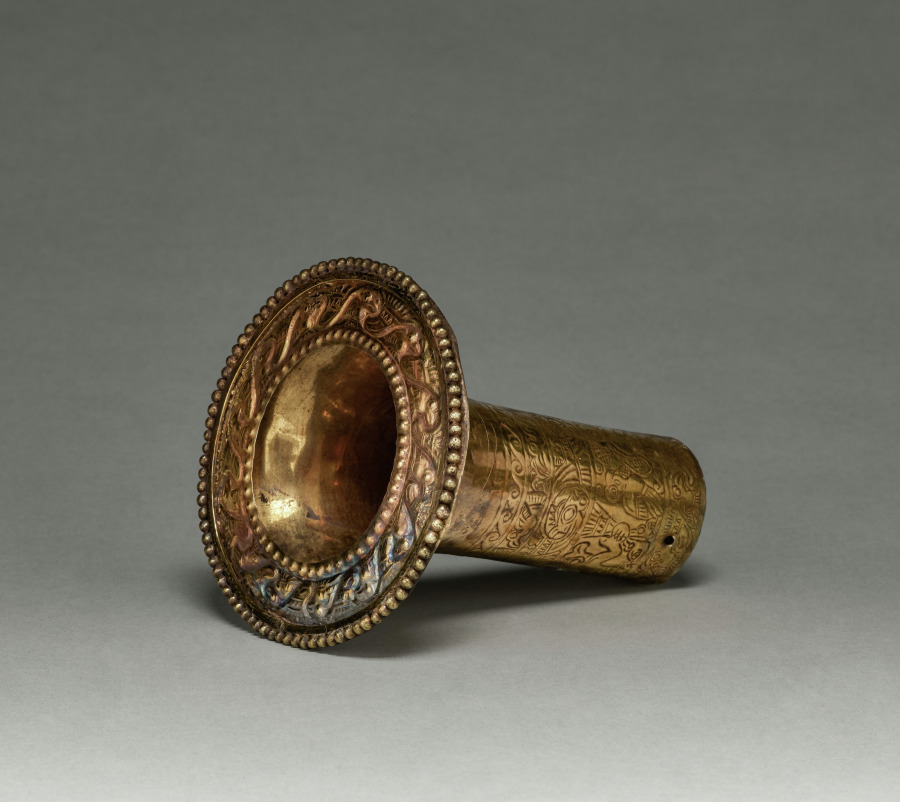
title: Ear Flare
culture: Peru, North Coast, Chimú style (900-1470)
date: 900–1470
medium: hammered gold alloy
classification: Metalwork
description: North Coast ear ornaments typically have a long shaft that balanced the weight of the glorious frontal. This pair illustrates Chimú interest in the sea, which had great economic and religious importance. On the shafts are bands of seabirds and waves, and a similar pattern edges the frontals, which were altered in modern times. Originally solid disks, the frontals' centers were cut out and a dotted band was added to the rim.